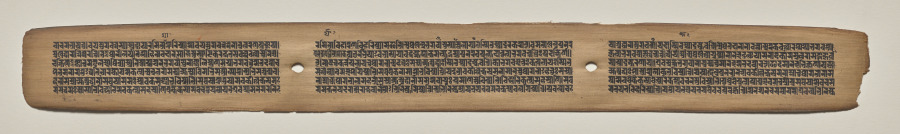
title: Text, folio 160 (recto), from a Manuscript of the Perfection of Wisdom in Eight Thousand Lines (Ashtasahasrika Prajnaparamita-sutra)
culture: Eastern India, Bihar, Vikramashila Monastery. Painting: Nepal, Kathmandu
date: Sunday, September 14, 1119 (year 239 of the Newar Samvat in the month of Ashvina)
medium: gum tempera and ink on palm leaves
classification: Painting